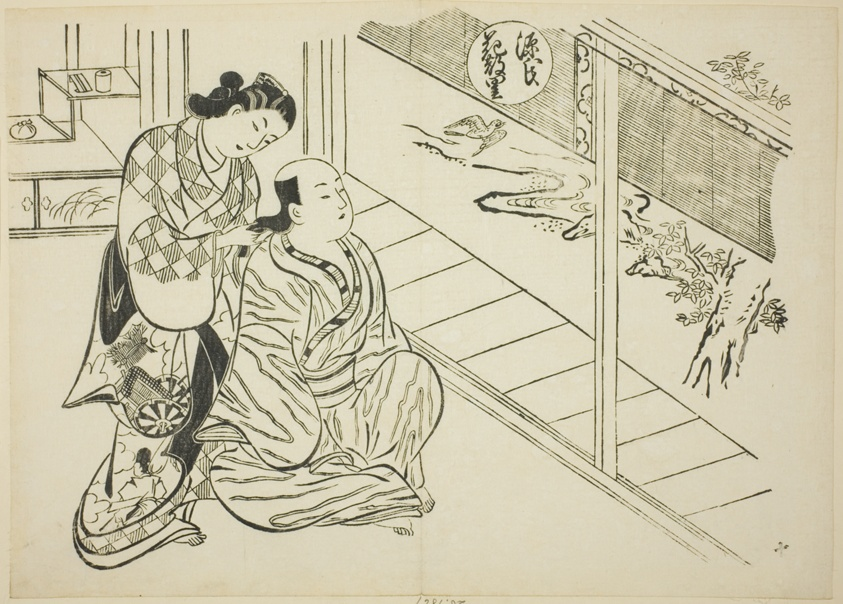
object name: Print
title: The Hanachirusato Chapter from "The Tale of Genji" (Genji Hanachirusato), from a series of Genji parodies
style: Japanese (culture or style)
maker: Okumura Masanobu (Japanese, 1686-1764)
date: c. 1710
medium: Woodblock print; oban, sumizuri-e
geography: Japan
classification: woodblock print; print; asian art; woodblock